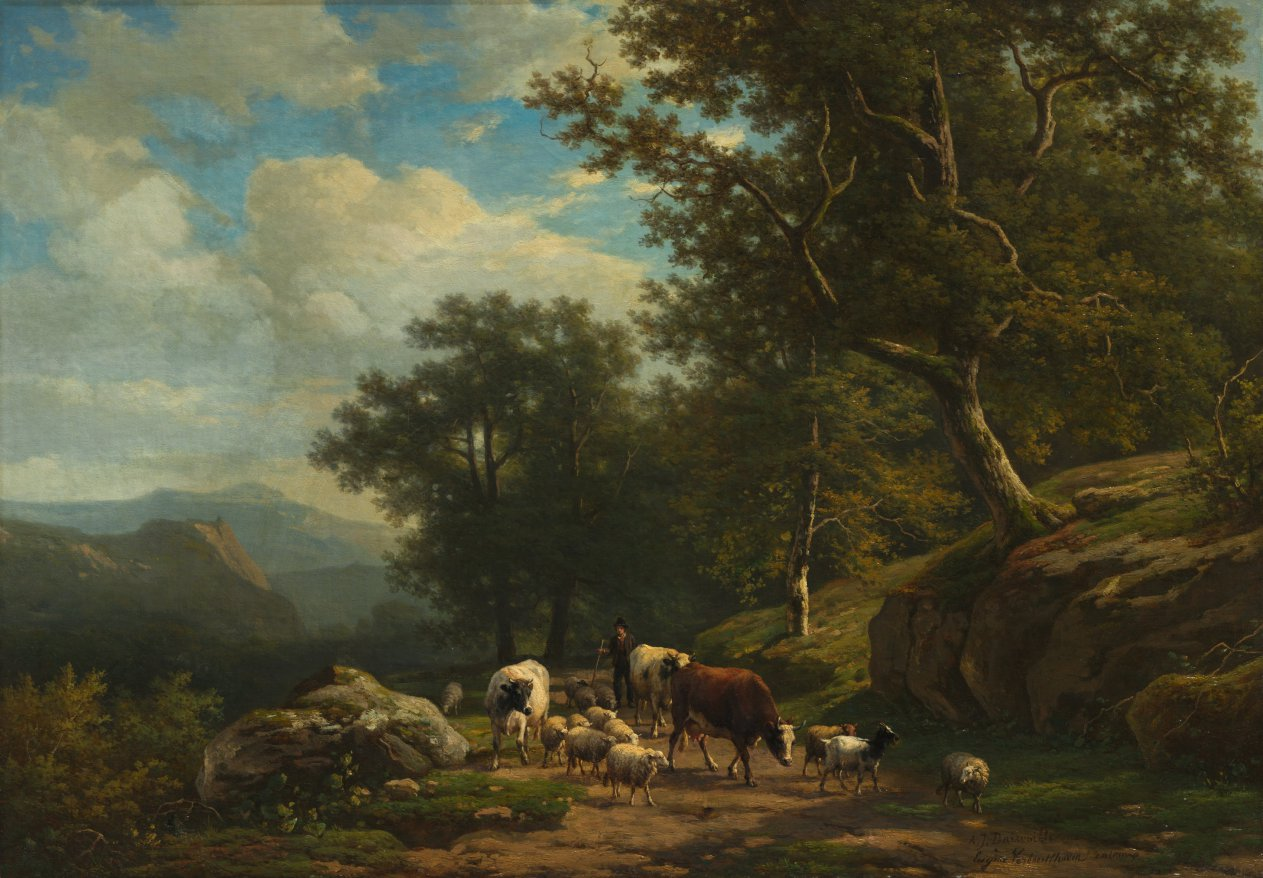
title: Landscape with a Peasant and His Flock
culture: Netherlands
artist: Alexander Joseph Daiwaille (Dutch, 1818–1888)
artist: and Eugène Joseph Verboeckhoven (Belgian, 1798–1881)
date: c. 1850–59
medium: oil on fabric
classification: Painting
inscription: Signed lower right: A. J. Daiwaille [in reddish-brown paint] / Eugène Verboeckhoven animaux [in black paint]